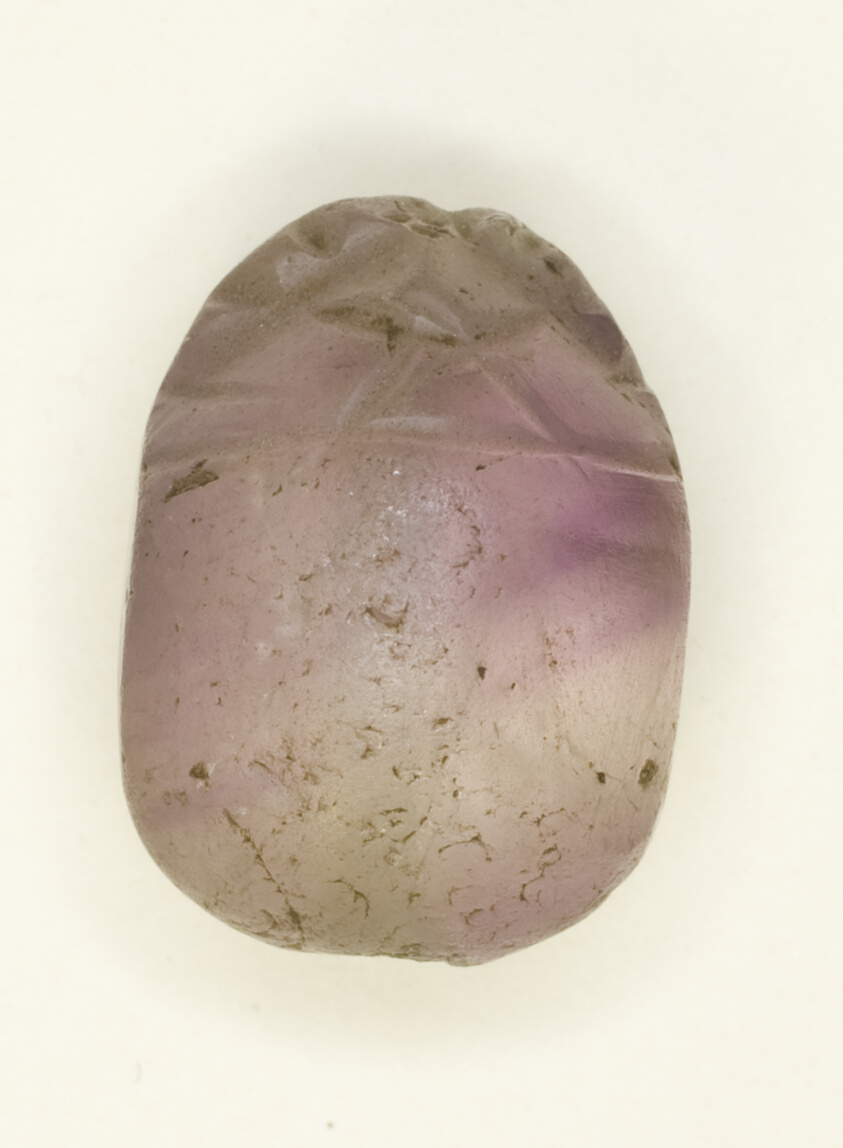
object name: Costume and Accessories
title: Scarab: Uninscribed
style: middle kingdom, twelfth dynasty, ancient, egyptian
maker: Egyptian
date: Middle Kingdom, Dynasty 12 (about 1985–1773 BCE)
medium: Amethyst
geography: Egypt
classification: scarab; stone; ancient art; costume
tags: scarab beetle, insects